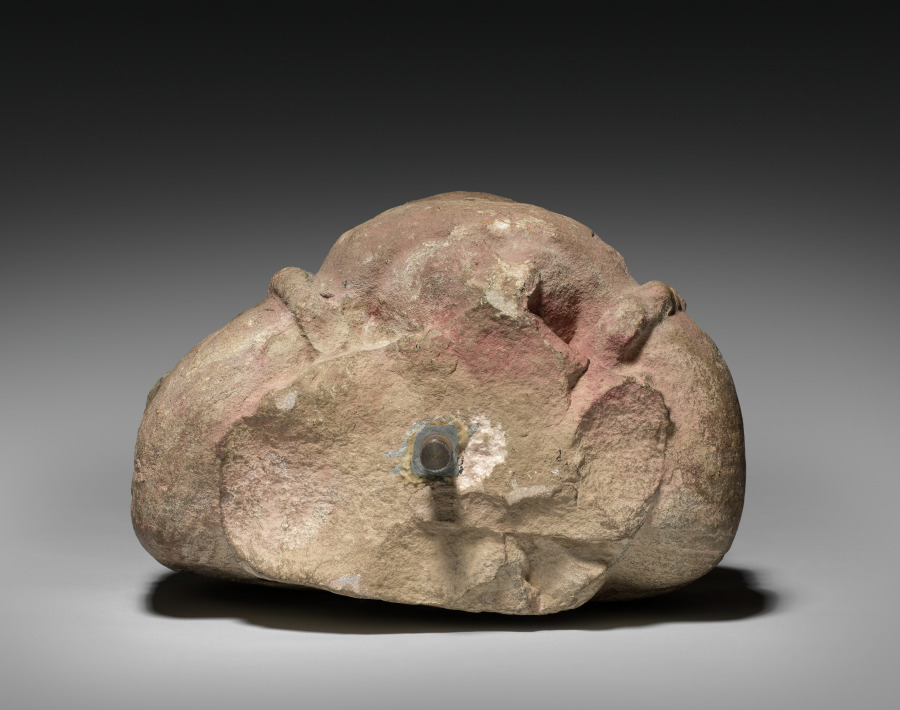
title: Shivagana Blowing Conch Shell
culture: India, Sarnath, Gupta Period, 5th Century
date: c. 400s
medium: stone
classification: Sculpture